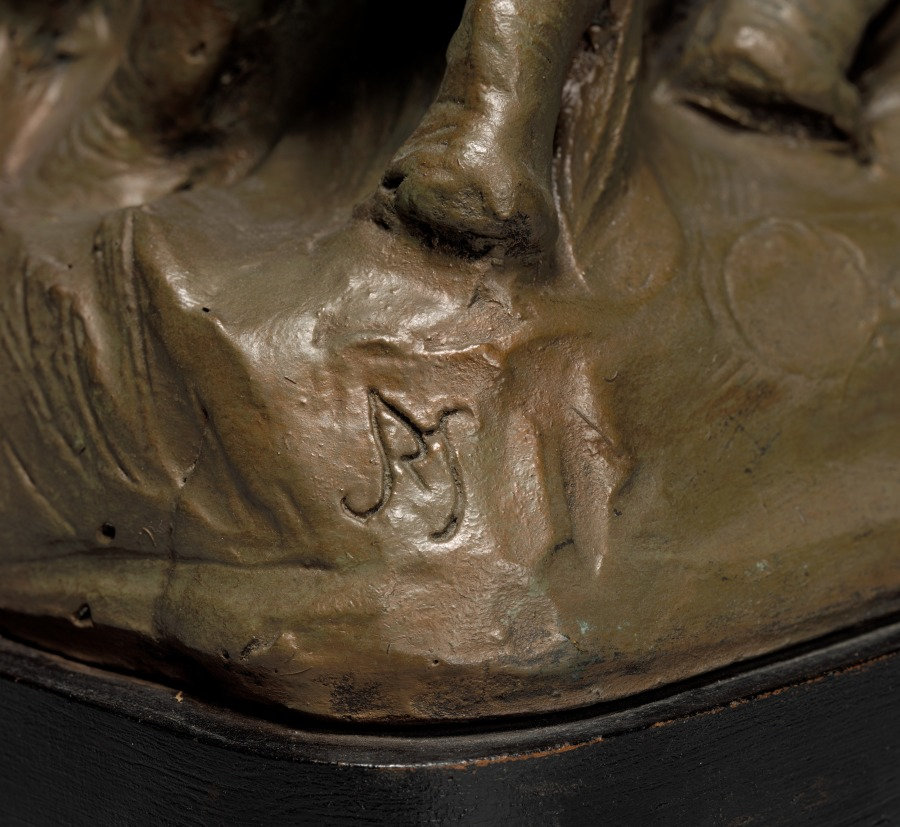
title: Mired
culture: America, Ohio, Cleveland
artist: John Ross Stewart (American, 1872–1954)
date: 1920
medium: plaster painted to resemble patinated green bronze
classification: Sculpture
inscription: incised in plaster near base: "Mired" and "JRS."